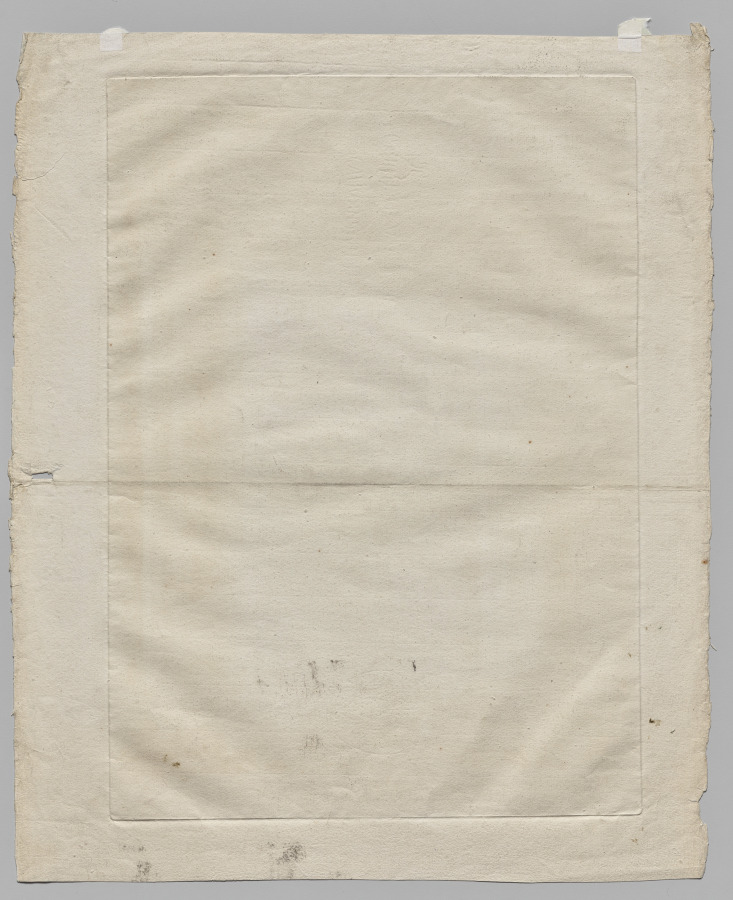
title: A View of the Vestibule of Saint Mary at Rome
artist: Georges Francois Blondel (French, 1730–1800)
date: 1766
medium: mezzotint printed in sepia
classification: Print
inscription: Imprinted on recto: “A View of the Vestibule of St. Mary at Rome”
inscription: Imprinted on recto: “G F Blondel Delin’t & Sculpt”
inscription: Imprinted on recto: “TO the Rt Hon’ble Mary Lady Hervy This Plate is most Humbly Dedicated by her Ladyships most humble Serv’t/Published according to Act/G F Blondel/Plate 4”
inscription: Watermark: Grand-Jésus stock of T. Dupuy, watermark Name of Jesus (IHS), countermark T Dupuy Fin Auvergne 1742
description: After returning from several years spent in Italy, the French printmaker George-Francois Blondel settled in London in order to take advantage of the English taste for images of Italian sites. This is one of a series of eight prints he published in 1766 depicting imagined and real Italian interiors. Using the relatively new technique of mezzotint, which creates velvety, dark tonal areas, as well as low vantage points, Blondel created towering, awe-inspiring spaces. For special patrons, he printed the plates in sepia ink, rather than in black; the CMA’s set includes two of these unusual sepia impressions.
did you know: Mezzotint was relatively new at the time this print was made and had yet to be utilized for such large plates of an architectural nature as seen here.